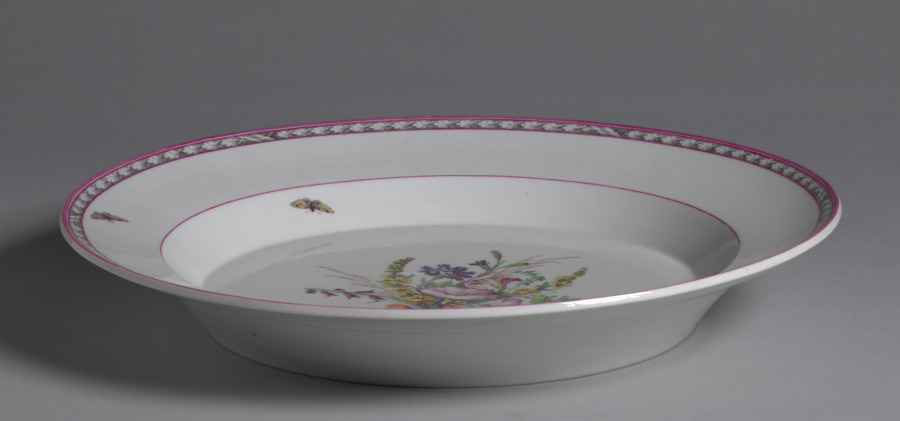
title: Platter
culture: Germany, Berlin, 18th century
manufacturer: Royal Porcelain Manufactory, Berlin (German)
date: 1763–1837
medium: porcelain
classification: Ceramic